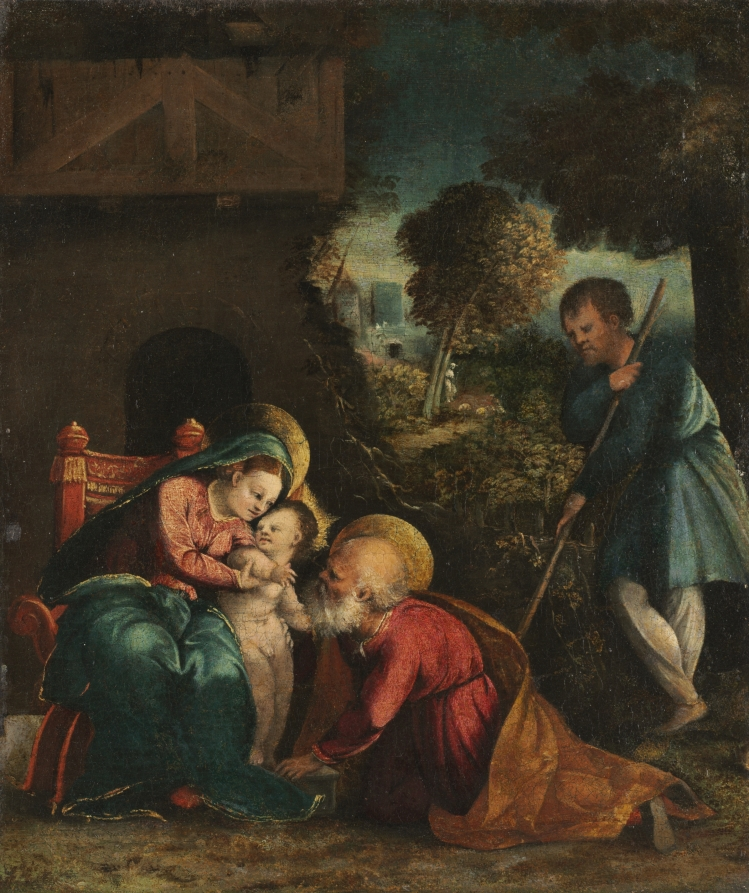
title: Holy Family with a Shepherd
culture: Italy, 16th century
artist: Battista Dossi (Italian, c. 1490–1548)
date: early 1520s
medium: oil on canvas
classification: Painting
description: In this image of the Holy Family, Joseph and Mary lean in to admire the Christ Child while a shepherd looks on, leaning on his staff. Before executing this painting, Battista visited Rome, including an extensive study of Raphael's works. Afterward, Battista began a second style of painting, seen in the flexible pose of Christ, the small hands of the adult figures, the high foreheads, and each figure looking sideways or upward. The landscape is impressionistic and grainy as mysterious silvery-blue moonlight accents the thickly wooded landscape. Rich reds, browns, and greens color the picturesque landscapes, typical of Battista's second style. This small painting was originally attributed to Battista Dossi's brother, Dosso. Both brothers served as court painters to the Duke Alfonso I of Ferrara. However, the symmetry and vibrant colors of the painting, as well as the facial styles of the figures, characterize the work of Battista Dossi.